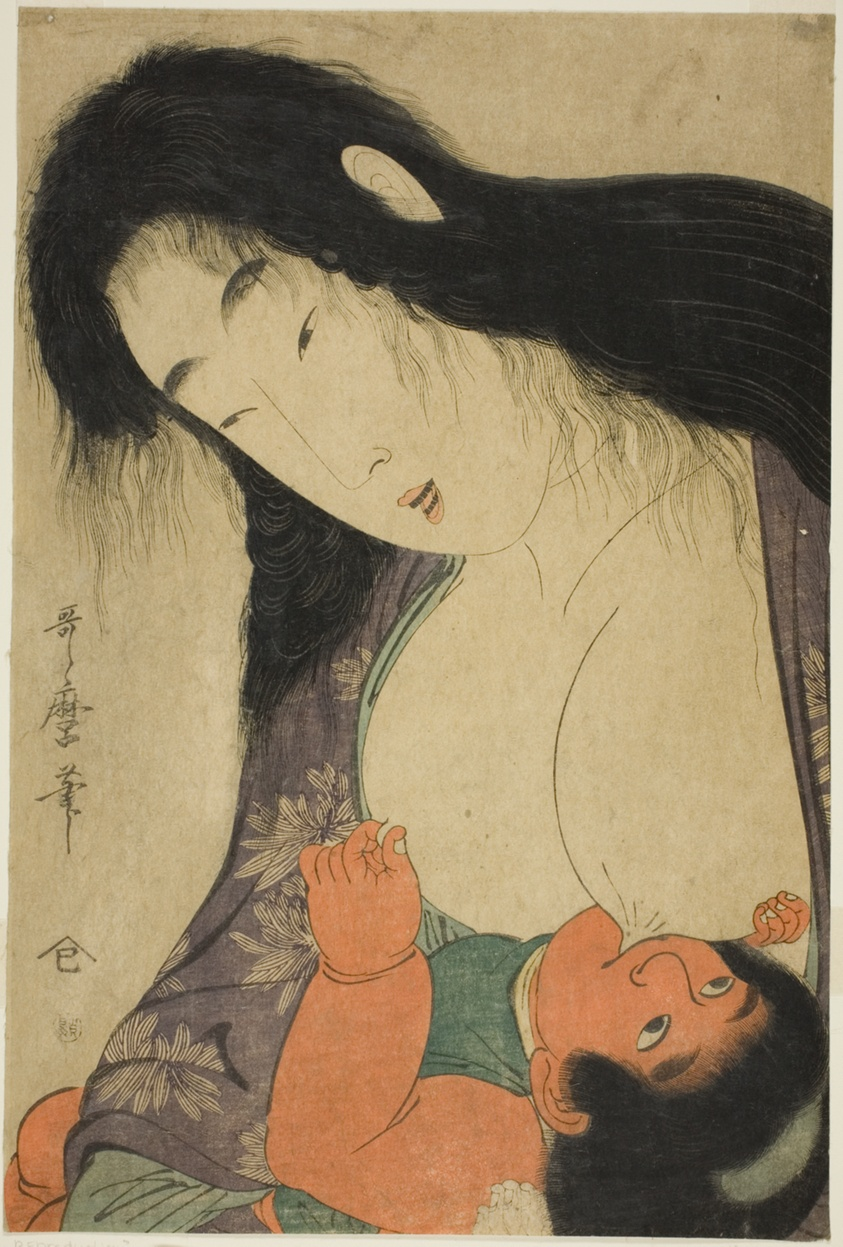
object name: Print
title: Yamauba Breast Feeding Kintaro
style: Japanese (culture or style)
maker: Kitagawa Utamaro 喜多川 歌麿; Japanese, 1753 (?)-1806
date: c. 1801/06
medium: Color woodblock print; oban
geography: Japan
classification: woodblock print; print; asian art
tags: mothers, parents, nursing (breast feeding), children, babies